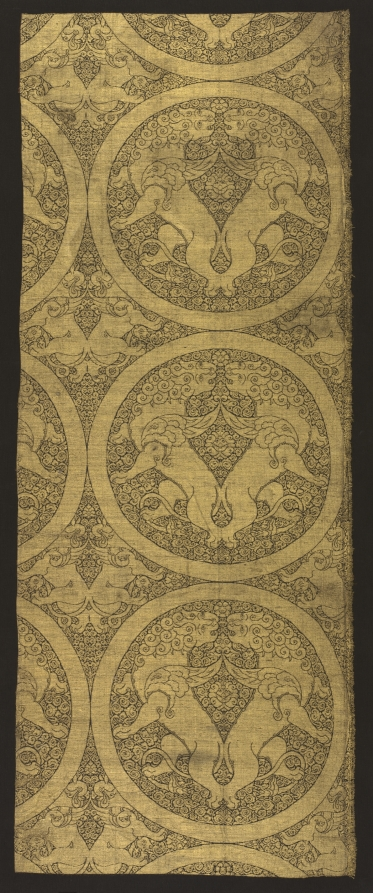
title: Cloth of gold with winged lions and griffins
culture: Central Asia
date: 1225–75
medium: Silk and gold thread: lampas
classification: Textile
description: The Mongols created exceptionally sumptuous cloths of gold to symbolize their imperial authority and legitimacy, this being the most resplendent example known. Opulent expanses of gold thread enrich the roundels, lions, and griffins in striking contrast with the intricate brown silk foliate ground. The pattern integrates motifs from Iran—paired lions in roundels and paired griffins—and from China, cloud ornaments on the lions’ wings. They suggest it was woven in an imperial workshop in Central Asia where Iranian and Chinese craftsmen worked together with local artisans. The gold is on a paper substrate associated with Asia, whereas animal skin substrates were used in Islamic lands. It is woven in a new technique developed by Iranian weavers, a combination of two weaves known as lampas, which was adopted internationally.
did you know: The tail of each paired griffin passes between its hind legs, loops around a rosette, and terminates in a feline head.